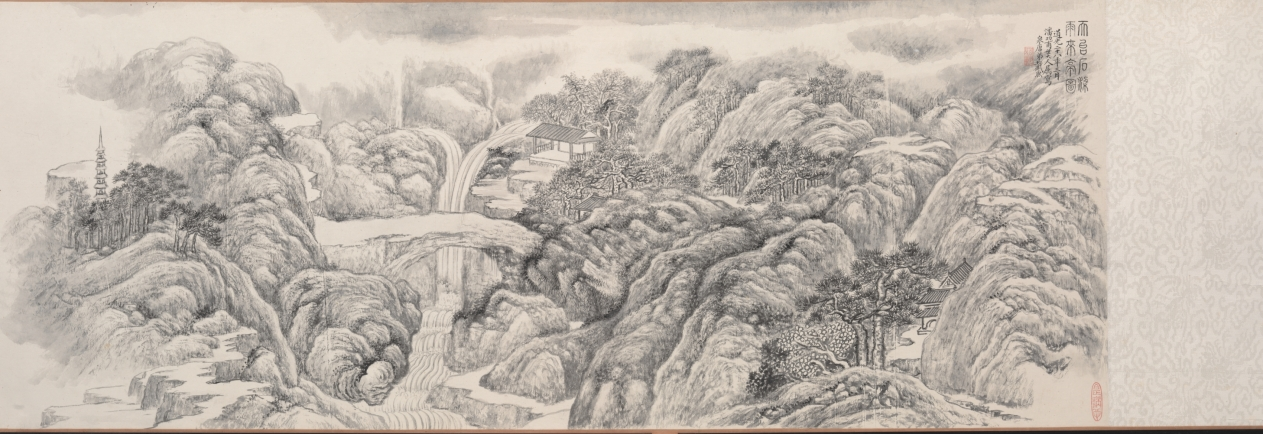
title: Rain-coming Pavilion by the Stone Bridge at Mt. Tiantai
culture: China, Qing dynasty (1644-1911)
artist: Dai Xi (Chinese, 1801–1860)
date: 1848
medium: handscroll, ink on paper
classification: Painting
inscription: Artist's inscription, signature, and 2 seals: Painting of Rain-Coming Pavilion by the Stone Bridge at Mount Tiantai. In the twenty-eighth year of the Daoguang era [1848], the third lunar month, requested by and painted for Pan Gongfu 潘功甫 [Pan Zengyi 潘曾沂], a senior family friend. [signed] Your junior, Dai Xi from Qiantang. [seal] Hebi jian Dai 何必見戴. [seal, lower right corner] Shih-ping yeh.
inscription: Title on frontispiece and 3 seals of Ruan Yuan (1764-1849). 1 colophon and 10 additional seals: 1 colophon, dated 1838, and 8 seals of Pan Zengyi (1792-1853); 2 seals unidentified.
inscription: Colophon by Pan Zengyi: The T'anhua [a flower that blooms only momentarily in semi-tropical areas] Pavilion near Shiliang [the natural stone bridge] was built by the Grand Chancellor Jia. It lasted over seven hundred years. After it was destroyed this year, I happened to be there, so I suggested it be reconstructed. Among the six poems commemorating my visit, one reads: The career of the Prime Minister may be as great as the rivers and lakes,/ Unaware himself of the fact there is leaking./ I had been all over the seventy-two peaks of P'eng-lai mountains/ When the timely rain came to T'an-hua Pavilion. It had not been raining for a long time there, then unexpectedly, the rain came simultaneously with my arrival; the old monk there asked me to change the name to Rain-Coming Pavilion, in order to record the joy. The hilly fields at Mt. Tiantai have suffered by droughts. If, from this year on, they have the timely rain to bring along bountiful harvests and make people happy - so may this pavilion be our witness. Hsiao-fu shan-jen, Pan Zengyi recorded this on the first day of the twelfth lunar month in the wuxu year [1838]. Chiang Yung-ching copied respectfully on the first day of the sixth lunar month in the wushen year [1848]. trans. LYSL/WKH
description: The subject is not just Mount Tiantai in Zhejiang Province, the ancient seat of the most powerful Buddhist sect of Sui and Tang dynasties, but records a specific occasion in 1838 when an official visited Tiantai and began the reconstruction of a historic pavilion. As this coincided with the end of a long drought, the building was auspiciously renamed the Yulai (Rain-Coming 雨來) Pavilion. Ten years later, Dai Xi painted this handscroll to commemorate the occasion.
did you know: Dai Xi actively resisted the Taiping rebels and drowned himself after their 1860 capture of his hometown, Hangzhou. For this loyal deed, Dai was posthumously rewarded with a temple built in his name.